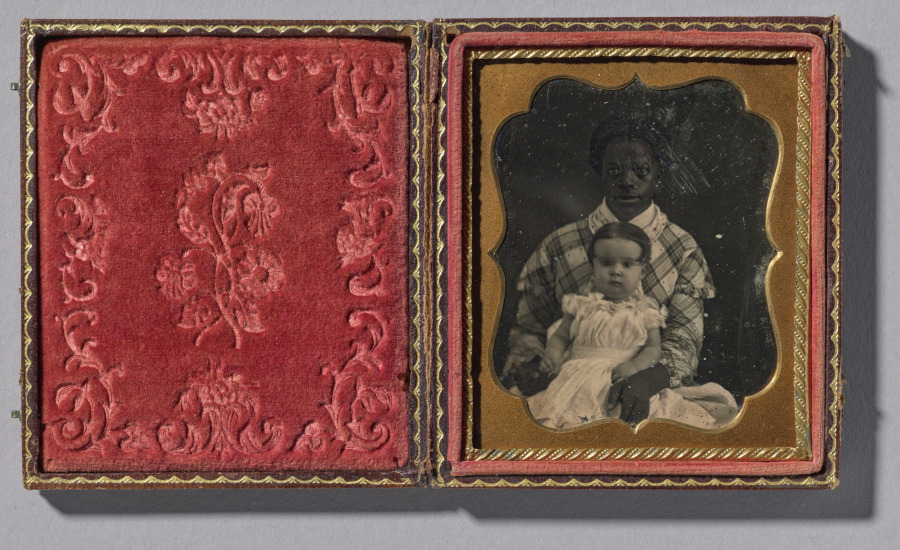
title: Black Woman and White Child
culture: America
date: c. 1855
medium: daguerreotype, sixth plate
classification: Photograph